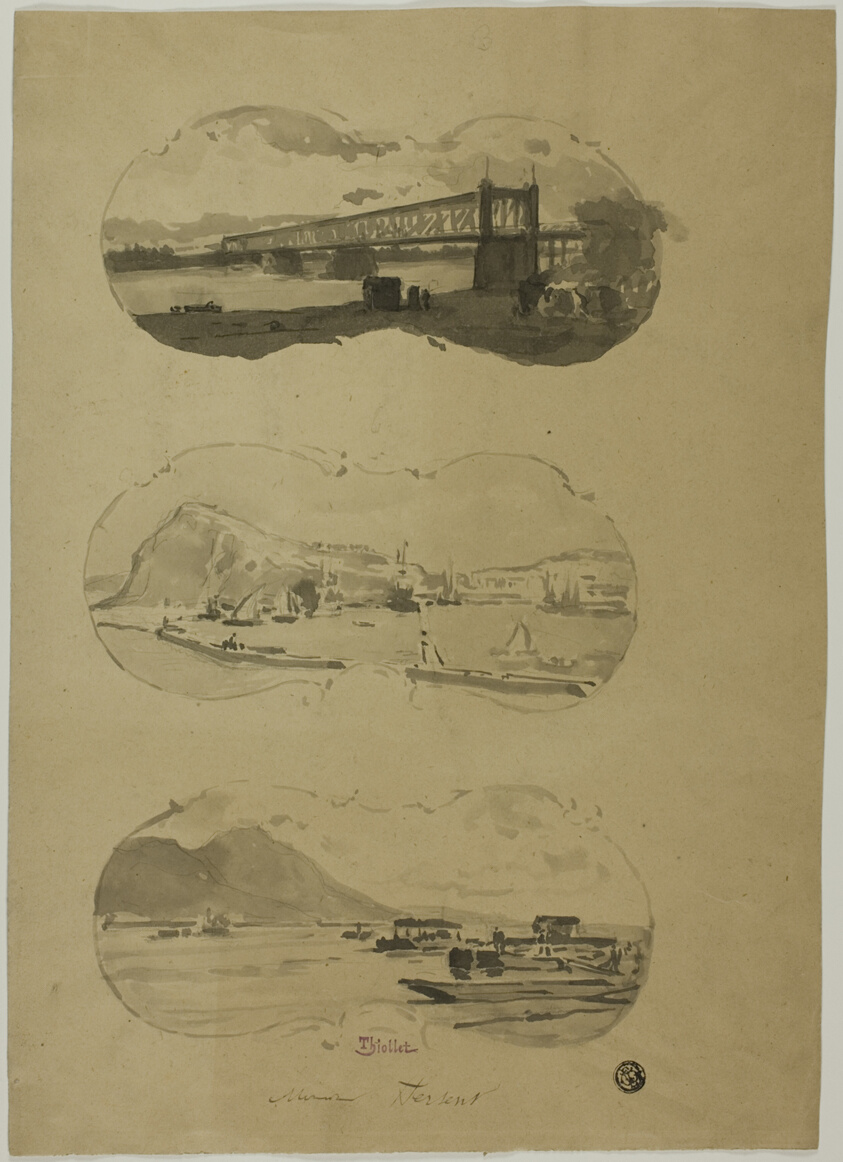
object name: Drawing and Watercolor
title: Two Views of Ports, one View of River with Bridge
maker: Alexandre Thiollet (French, 1824-1895)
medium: Brush and black and gray wash, with graphite, on tan wove paper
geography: France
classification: ink or chalk wash; drawings (visual works); prints and drawing